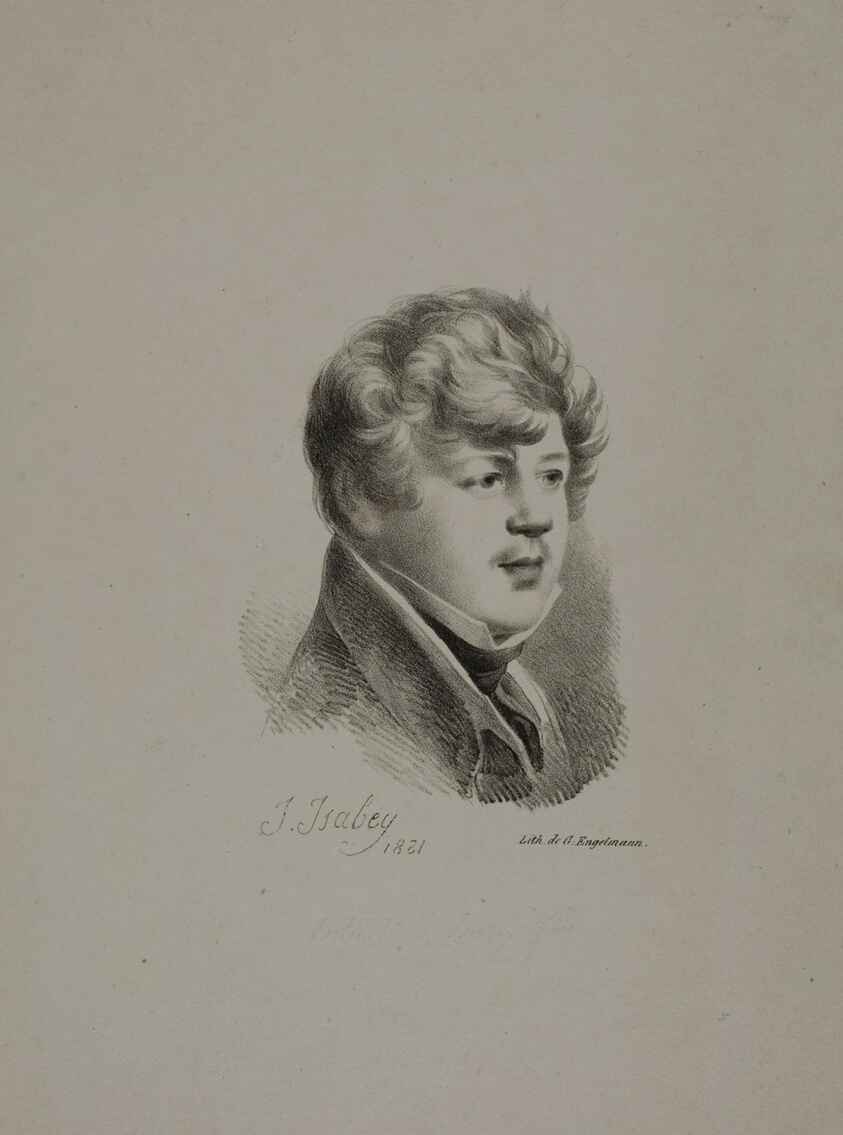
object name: Print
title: Eugène Isabey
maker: Jean-Baptiste Isabey (French, 1767-1855)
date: 1880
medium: Lithograph on ivory wove paper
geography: France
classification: lithograph; print; prints and drawing